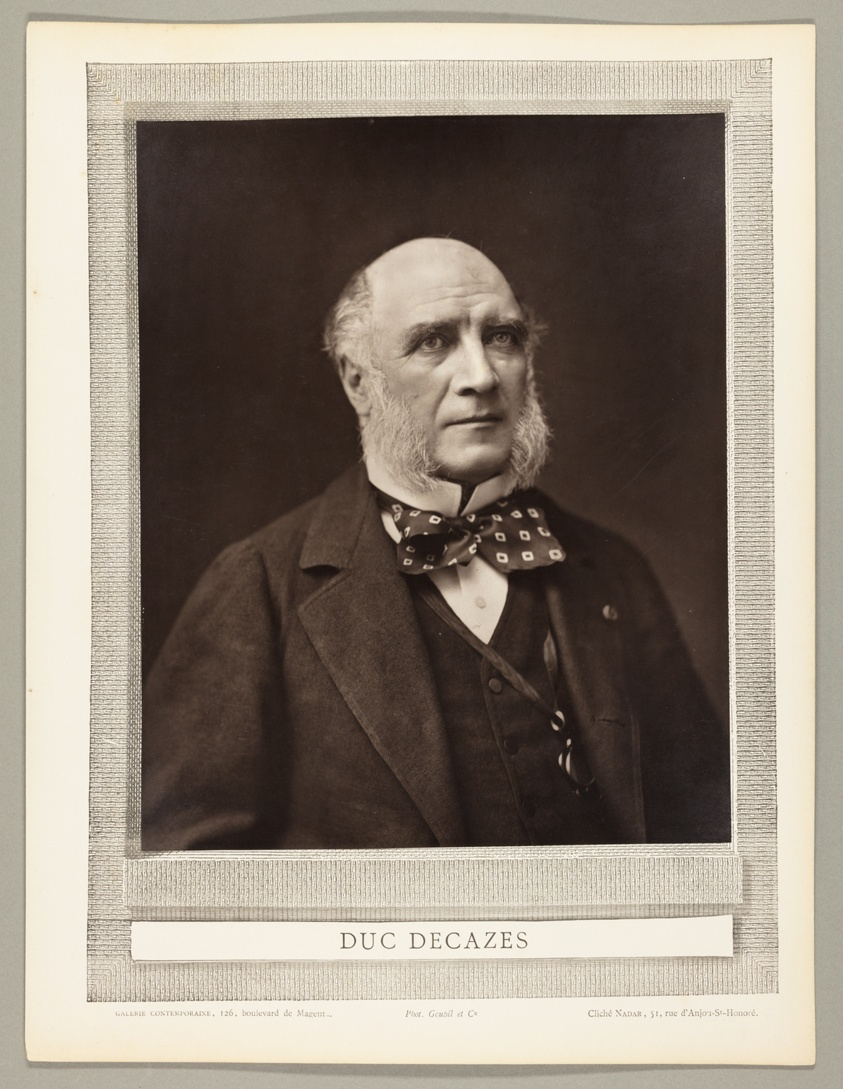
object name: Photograph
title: Élie-Louis, duc Decazes (French statesman and diplomat, 1819-1886)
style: 19th century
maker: Nadar (Gaspard Félix Tournachon) (French, 1820–1910)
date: c. 1853/77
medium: Woodburytype, from the periodical “Galerie Contemporaine Littéraire, Artistique” (1877), volume 2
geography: France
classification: woodburytype; photomechanical process; photography; photograph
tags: Collected by Hugh Edwards, Contemporaine Littéraire